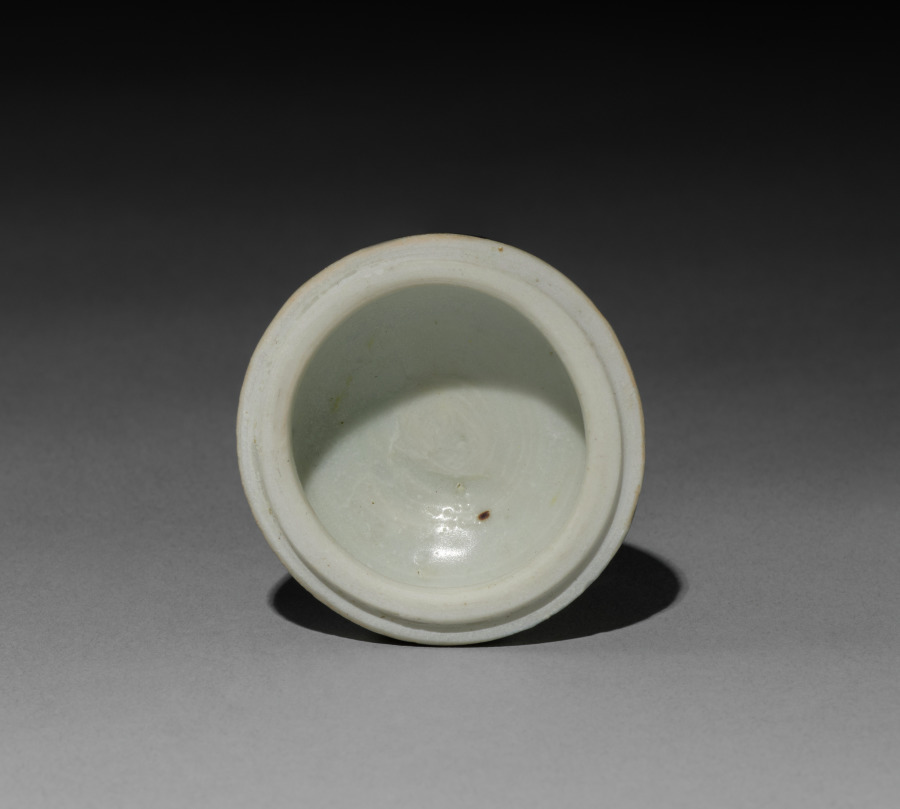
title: Pill Box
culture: China, Qing dynasty (1644-1911)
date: c. 1752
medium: porcelain with blue and white decoration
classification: Ceramic